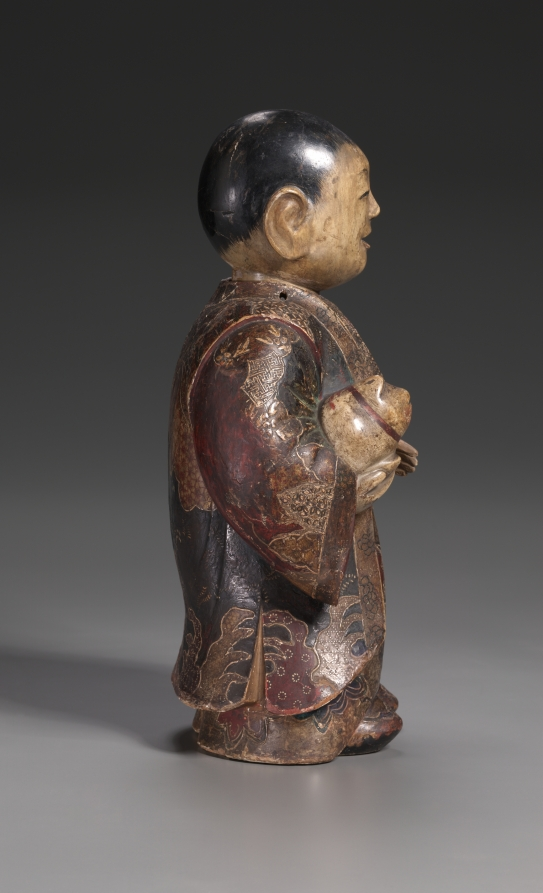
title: Boy with Puppy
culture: Japan, Edo period (1615–1868)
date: c. 1800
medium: wood with lacquer and color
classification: Sculpture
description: This is a Saga doll, a type of doll thought to have originated in 16th-century Saga, outside of Kyoto. The colors and patterns of the doll’s robe resemble the fashion of the latter part of the Momoyama period (1573–1615). The doll is a nodder, with its head carved separately; when its head moves, its tongue sticks out.